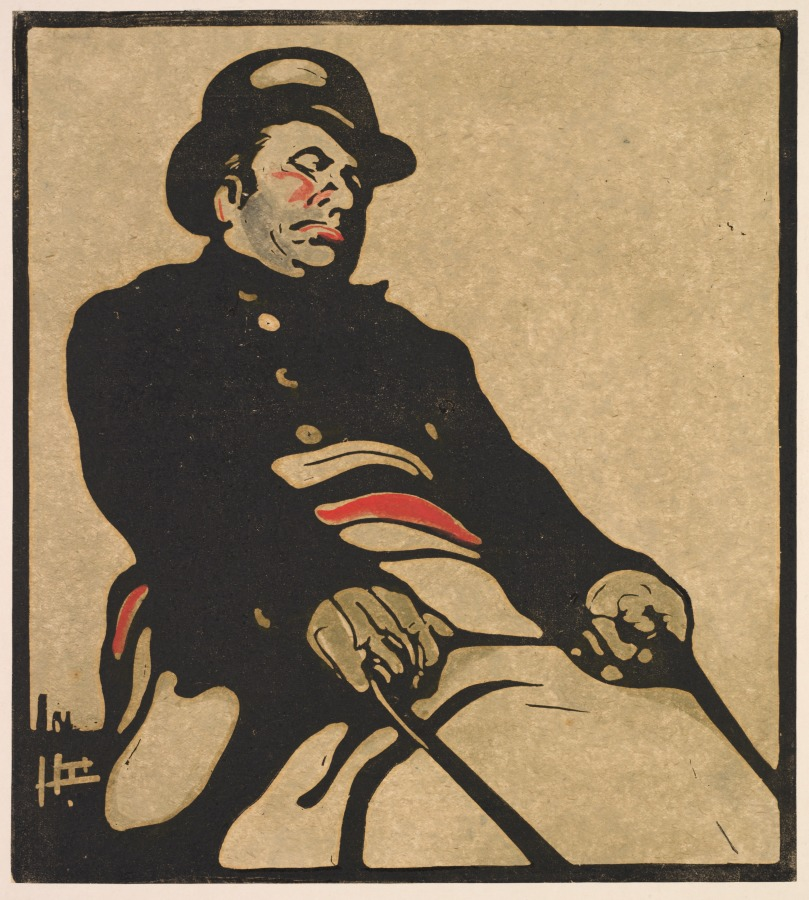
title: London Types: Bus Driver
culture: England, 19th century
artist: William Nicholson (British, 1872–1949)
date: 1898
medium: woodcut hand-colored with watercolor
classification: Print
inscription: lower left margin, in black ink: William Nicholson 1898.